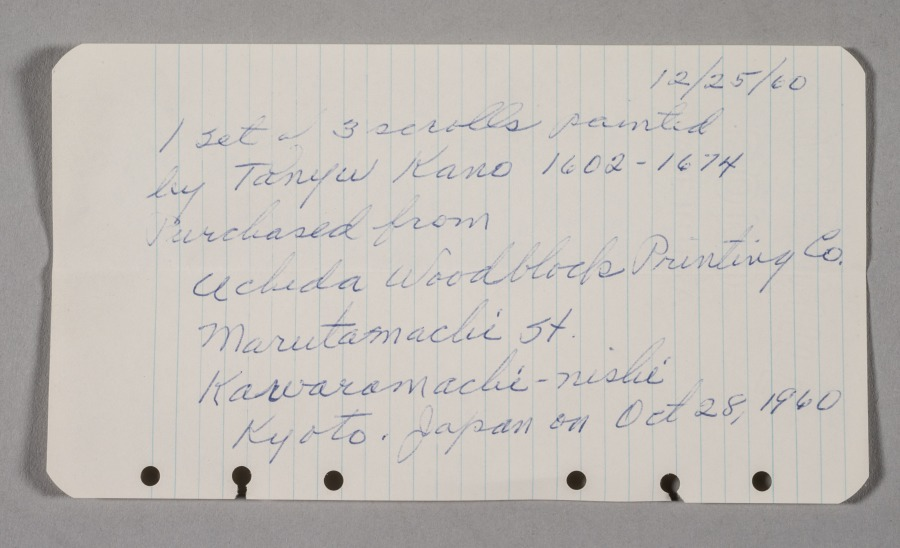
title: Sparrows on Blossoming Plum; A Sage with Tiger; Chinese Bird on Snow-Laden Branch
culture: Japan, Edo period (1615–1868)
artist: Kano Tan’yū (Japanese, 1602–1674)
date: 1661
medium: Triptych of hanging scrolls; ink and slight color on silk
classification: Painting